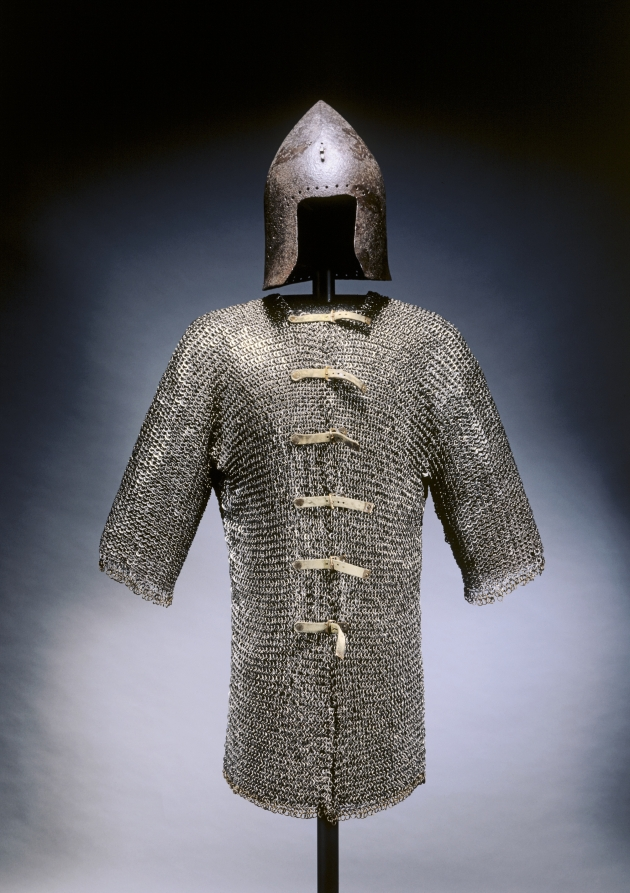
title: Barbute (from the Venetian Garrison at Chalcis)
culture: North Italy, 14th-15th century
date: c. 1350–1420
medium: iron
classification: Arms and Armor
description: This is a rare example of a type of helmet used from about 1350 to 1480. Its conical shape deflected glancing blows to the head. Italian chronicles refer to professional men-at-arms as barbuti. The word derives from the Italian barba, or beard, a reference to the hood of mail often attached to these early helmets. The row of small holes along the face opening and neck were for the attachment of the hood and lining.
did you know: This helmet and a number of others were apparently excavated from the Venetian garrison at Chalcis on the Greek island of Euboea.